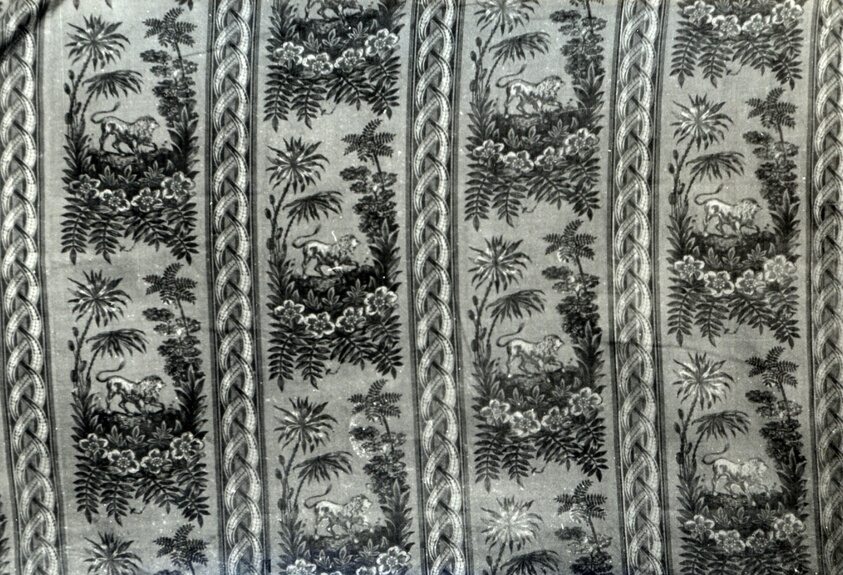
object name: Textile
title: Panel (Furnishing Fabric)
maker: France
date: 19th century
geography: France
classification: textile; weaving - printed; furnishing textile